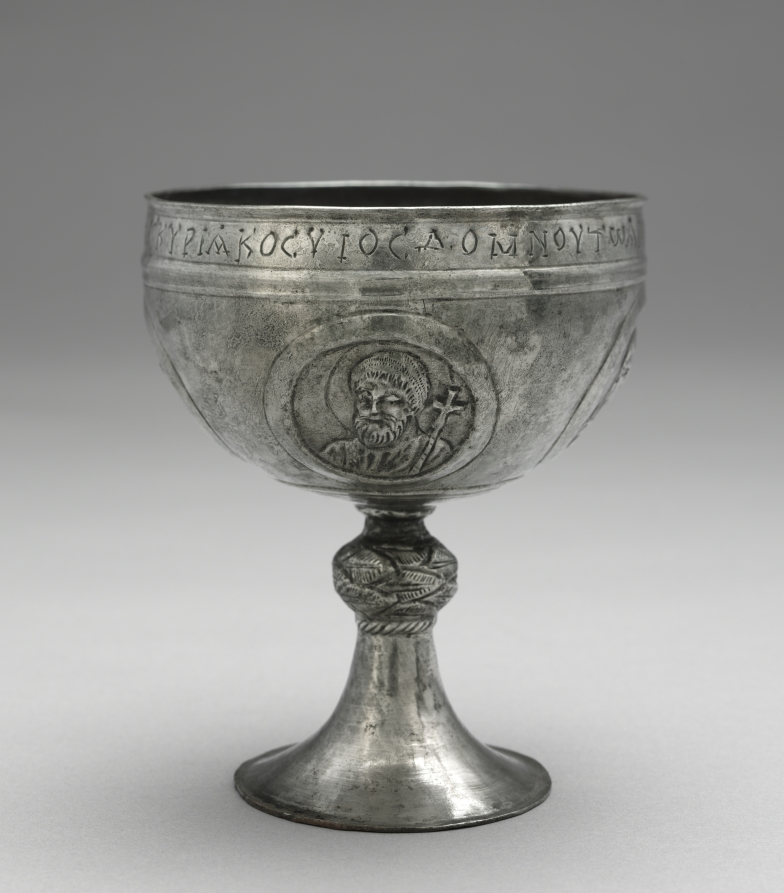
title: Chalice from the Beth Misona Treasure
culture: early Byzantium, Constantinople or Syria, Byzantine period, 6th-7th Century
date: c. 500–700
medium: silver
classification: Metalwork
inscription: the Greek inscription at the top, under an engraved line translates as: + The priest, KYRIAKOS, son of DOMNOS, (gave this chalice) to St. Sergios, in the time of Zeno the priest.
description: These four liturgical silver vessels—a paten and three chalices (1950.378–81)—form what is now called the Beth Misona Treasure, named for the village in northern Syria for which the objects were made. While nothing is known about the exact location and circumstances of the treasure's discovery, the people of the village of Beth Misona were, like other Christian communities in Syria and Palestine, probably forced to bury their church silver to hide it from the Persians or Arabs, who conquered their lands in the first half of the 600s. The paten, which held pieces of Eucharistic bread used during Mass, is decorated with an engraved Latin cross surrounded by a dedicatory inscription that names the paten's donor—Domnos—and its original location, the church of Saint Sergios in Beth Misona. The chalices, which contained the Eucharistic wine used during Mass, feature broad cups decorated with portrait busts of Saints Peter and Paul, Christ, and the Virgin. One chalice bears a dedicatory inscription naming its donor—Kyriakos, Domnos's son—and the priest of the church that received the pious gift—Zeno.